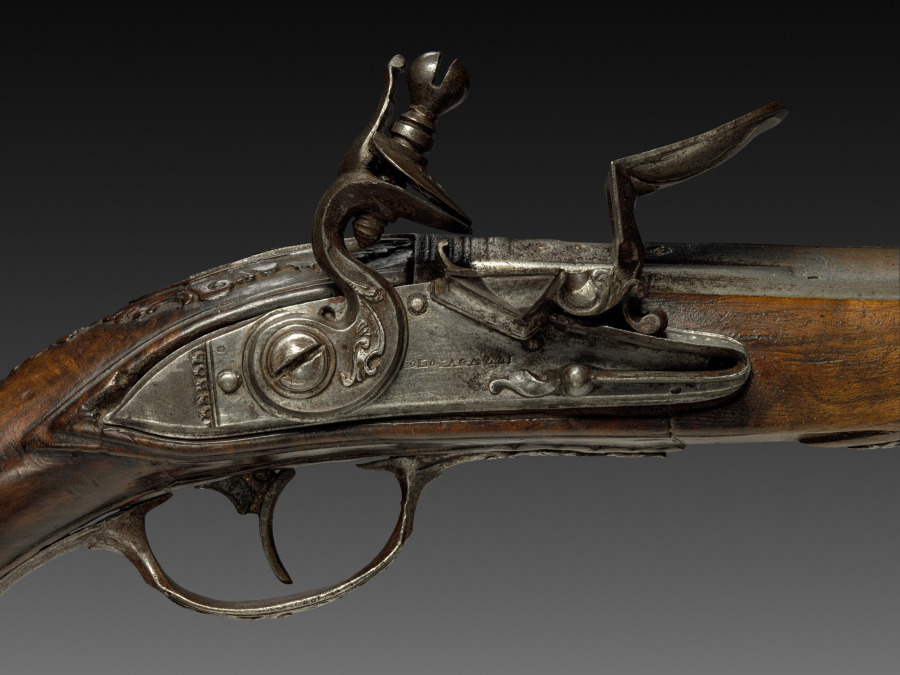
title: Flintlock Pistol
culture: Italy, Brescia, 18th century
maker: Bortolo Agazzi (Italian)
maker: Lazaro Lazarino (Italian)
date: 1700s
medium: steel with traces of gilding; walnut stock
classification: Arms and Armor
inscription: on lock: Bortolo Agazzi; on barrel: Lazaro Lazarino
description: The flintlock was the most popular style of lock in all of Europe in the mid 1600s through the 1700s except in Spain and Italy where the snaphance was more dominant. This pistol's shine comes from the gold that was applied to the steel shaft. This shiny surface is set off by the rich walnut stock. Upon close inspection, you can see areas of damage to the walnut and even a missing section of decoration on the rear of the handle.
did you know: The term flintlock is used to describe any firearm that uses a flint-striking ignition mechanism.